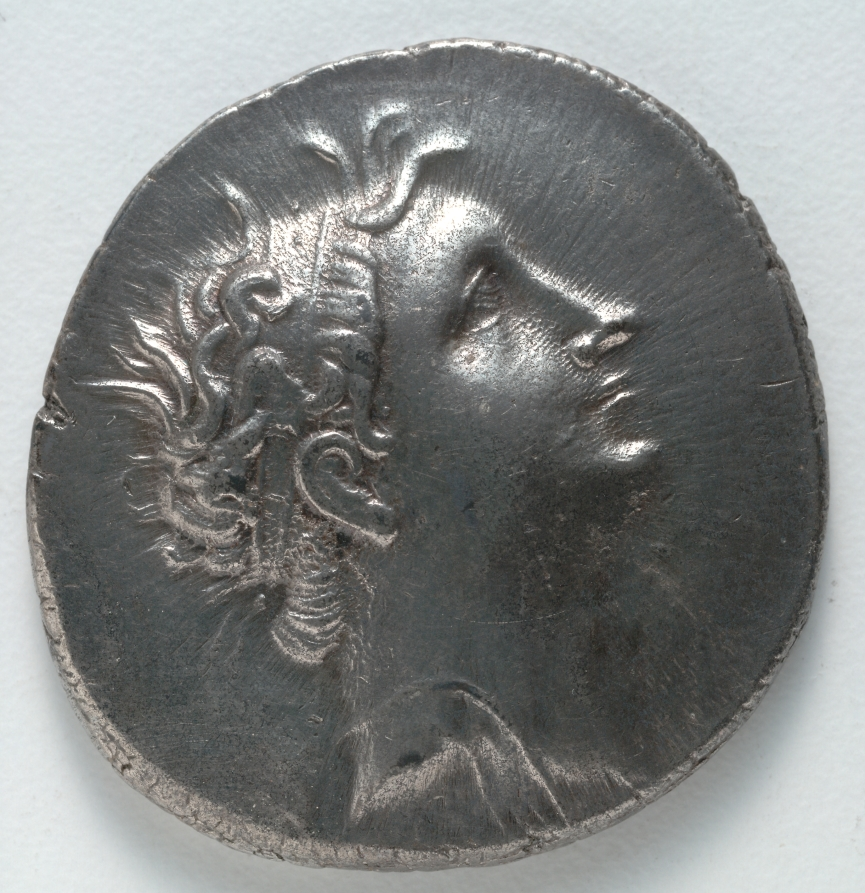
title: Tetradrachm: Head of Nicomedes II (obverse)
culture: Greek, Bithynian, minted in Bithynia, reign of Nicomedes II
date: 149–120 BCE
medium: silver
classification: Coins